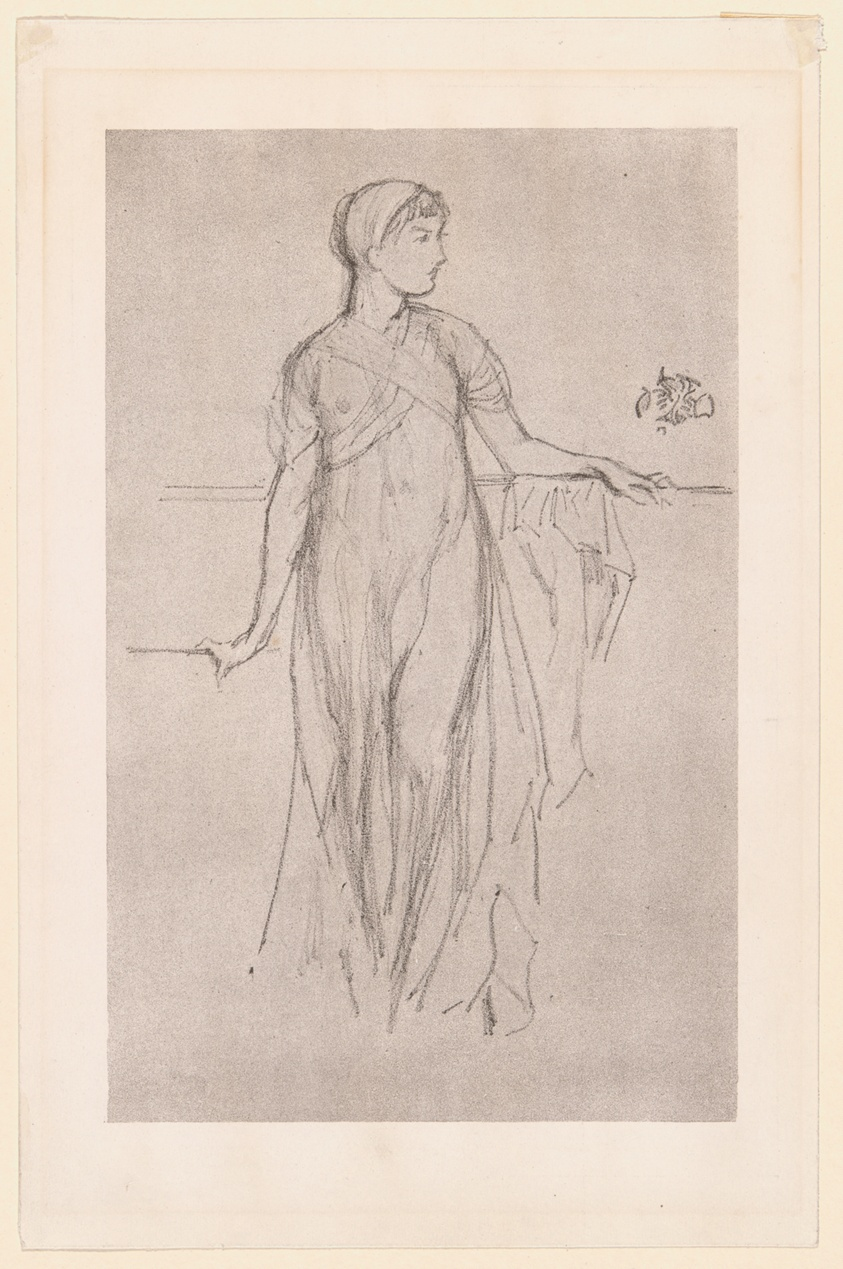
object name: Print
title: Study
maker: James McNeill Whistler (American, 1834-1903)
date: 1879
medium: Lithograph, in black ink, on a prepared half-tint ground, with scraping, on ivory plate paper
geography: United States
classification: lithograph; print; prints and drawing; paper